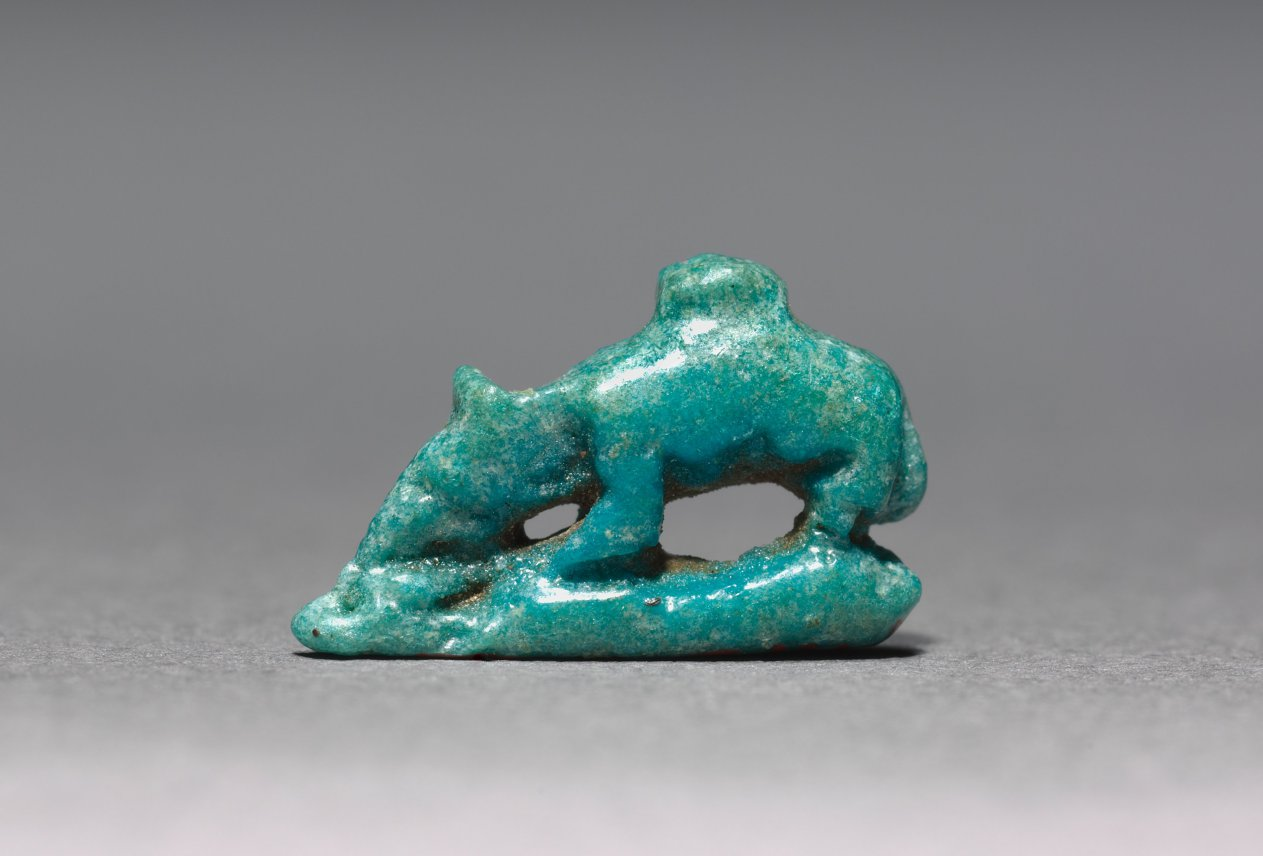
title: Amulet of a Shrew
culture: Egypt, Late period (715–332 BCE)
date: 715–332 BCE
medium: turquoise green faience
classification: Amulets